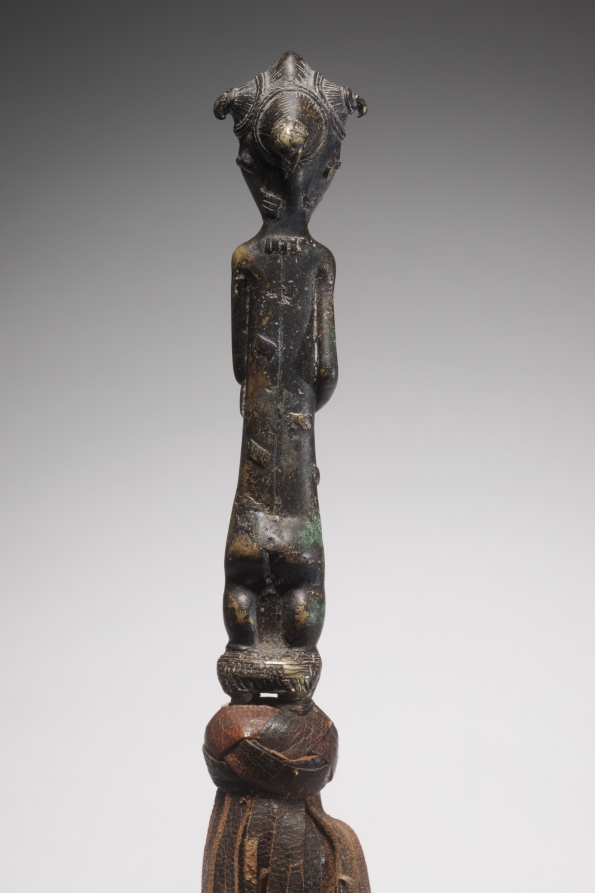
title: Flywhisk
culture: Africa, West Africa, Côte d'Ivoire, Baule-style maker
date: c. 1850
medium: Copper alloy and leather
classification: Sculpture